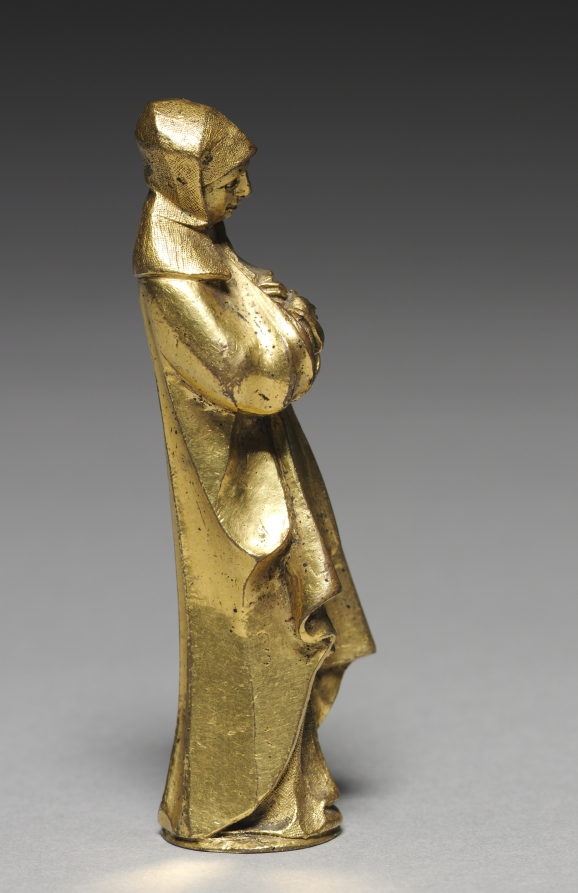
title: Mourning Virgin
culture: Germany, Franconia, late 15th century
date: late 1400s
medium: gilt bronze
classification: Sculpture